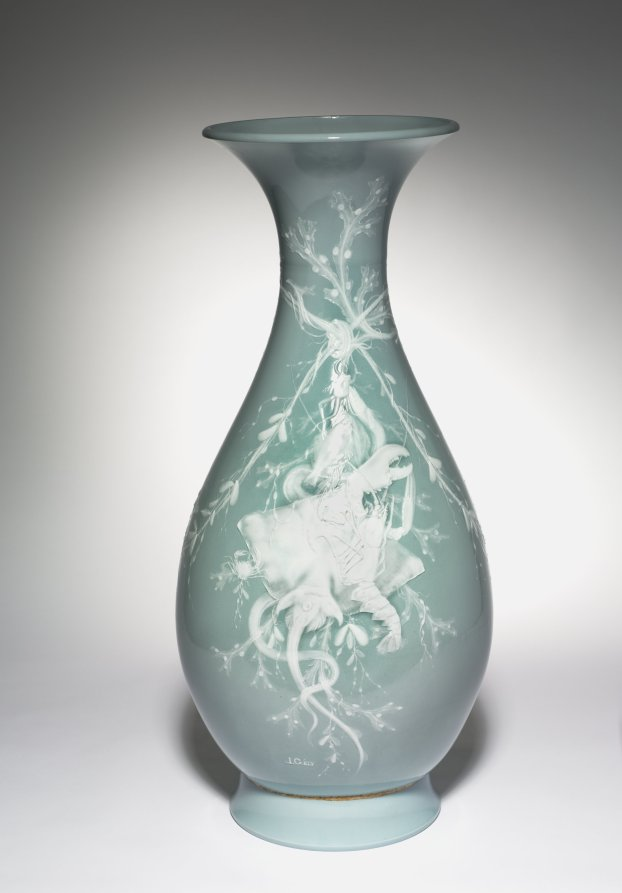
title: Vase Bertin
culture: France, 19th century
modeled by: Jules-Constant Peyre (French, 1811–1870?)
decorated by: Léopold Jules Gély (French)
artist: Sèvres Porcelain Factory (French, est. 1756)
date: c. 1855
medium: porcelain with pâte-sur-pâte decoration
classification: Ceramic